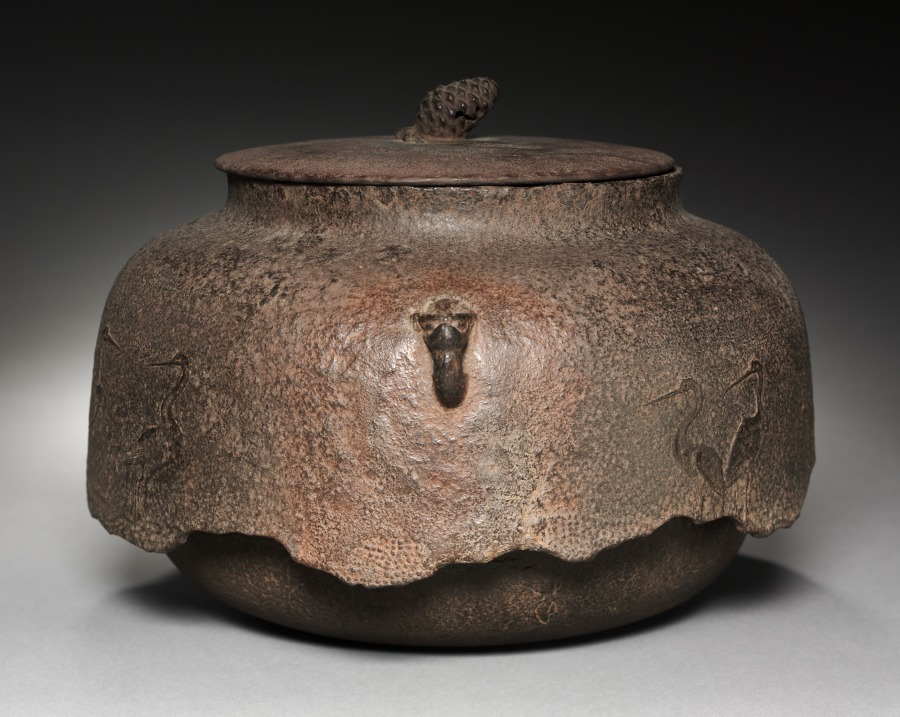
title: Kettle with Crane Design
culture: Japan, Muromachi period (1392–1573)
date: 1392–1573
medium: iron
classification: Metalwork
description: Water supplied from a jar such as the fine Shino-ware vessel (CMA 1972.9.a-b) was transferred to an iron kettle for boiling as part of the tea ceremony. Former CMA director Sherman Lee described the jagged, broken skirt of this kettle as "attractively damaged," complementing the unobtrusive wispy designs on its rough metal surface. The character of this kettle—worn, coarse, the "perfection" of symmetry destroyed—was cherished by tea masters for its powerful humility.